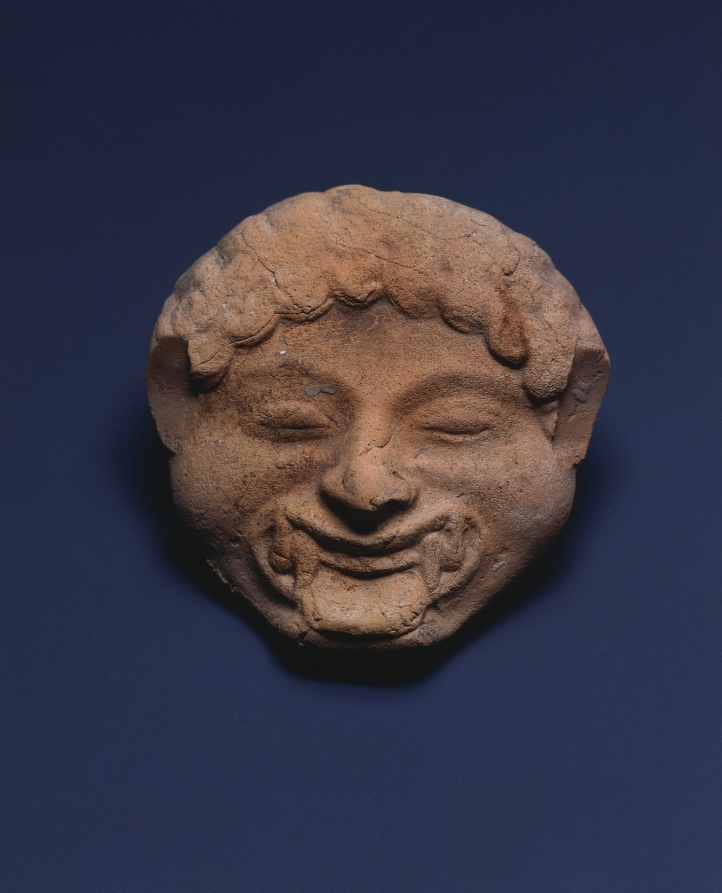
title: Gorgoneion Plaque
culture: Greece, South Italy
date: c. 525–475 BCE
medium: terracotta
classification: Sculpture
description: Probably meant to decorate the outside of a wooden coffin or other tomb furniture, this small mold-made terracotta plaque is one of two in the collection (click here for the other). Both bear gorgoneia, or frontal Gorgon faces, with snaky hair, sharp teeth, and protruding tongue, perhaps meant to ward off evils. A bit of fingerprint survives on the reverse, likely from its ancient maker.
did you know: The gorgoneion, or disembodied head of Medusa, may have served as protection against evils.